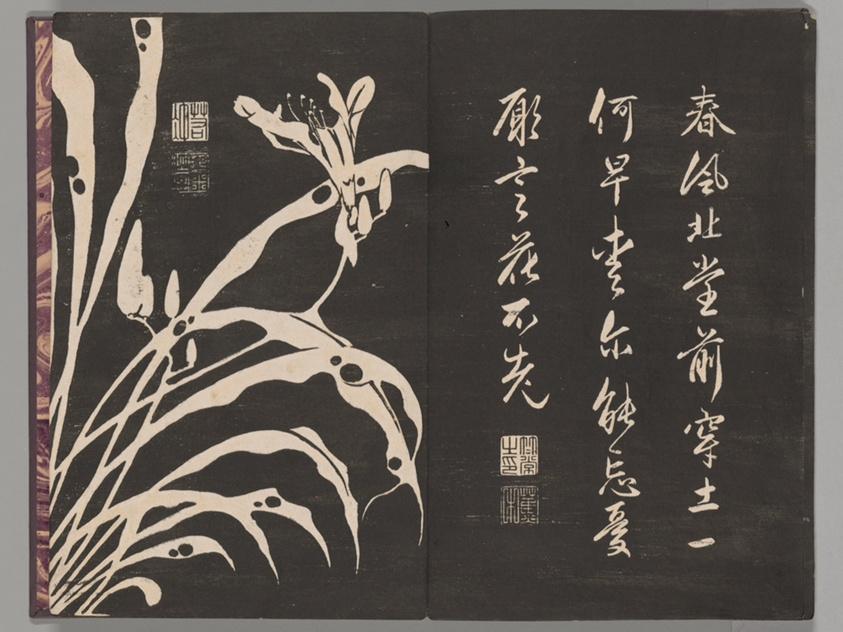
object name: Book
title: Soken sekisatsu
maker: Ito Jakuchu (Japanese, 1716-1800)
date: 1767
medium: Woodblock printed book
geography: Japan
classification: book